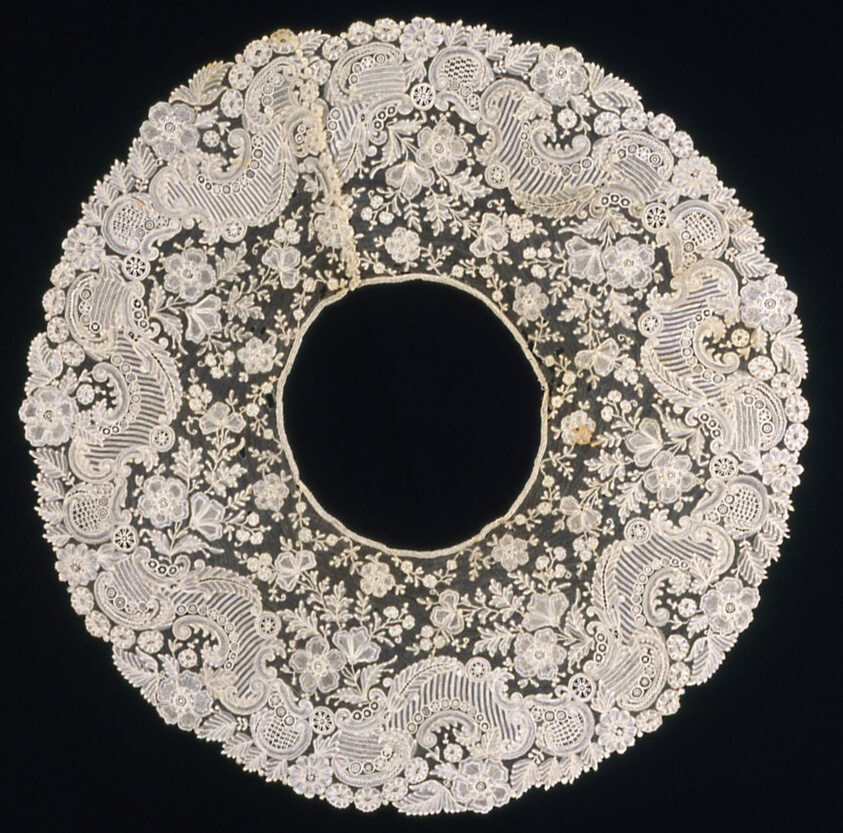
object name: Textile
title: Bertha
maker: Belgium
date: 1895/1905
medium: Cotton, mixed lace of needle lace and bobbin part lace of a type known as "Duchesse"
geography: Belgium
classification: textile; lace - mixed; lace